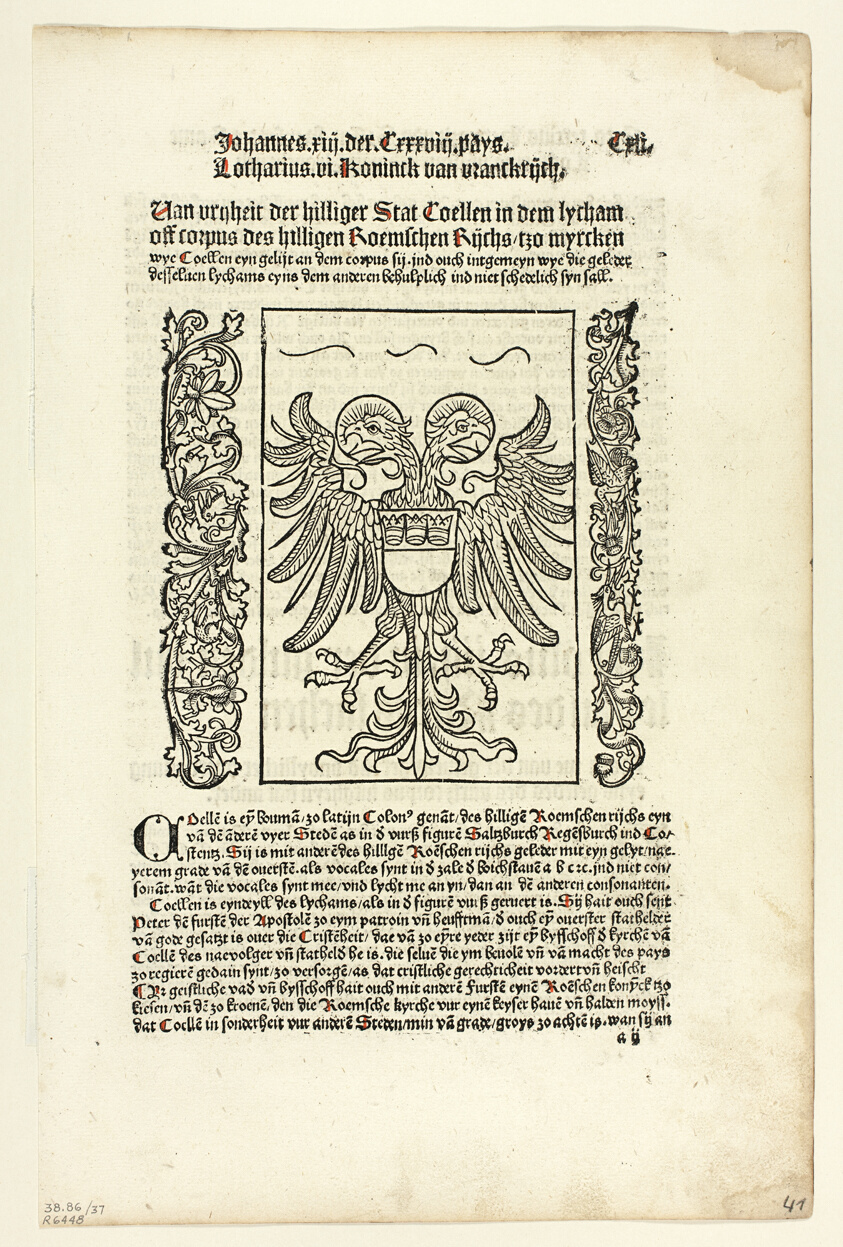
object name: Print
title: Holy Roman Empire Coat of Arms with Cologne Coat of Arms from Koelner Chronik (Cologne Chronicle), Plate 37 from Woodcuts from Books of the 15th Century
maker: Unknown Artist (Cologne, late 15th century); printed and published by Johann Kœlhoff the Younger (German, active 1487–1502); portfolio text by Wilhelm Ludwig Schreiber (German, 1855–1932)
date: 1499, portfolio assembled 1929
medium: Woodcut in black, and letterpress in black with rubrication (recto and verso), on cream laid paper, tipped onto cream wove paper mat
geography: Germany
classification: woodcut; print; prints and drawing